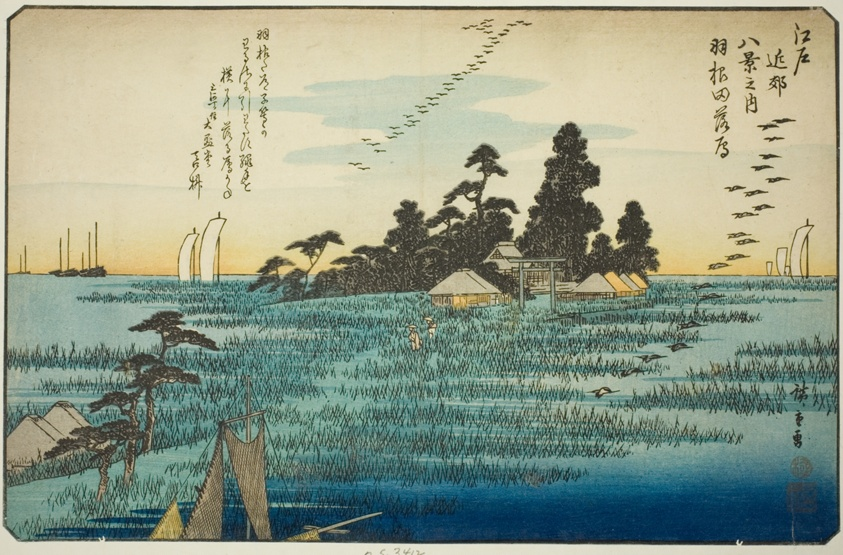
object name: Print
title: Descending Geese at Haneda (Haneda no rakugan), from the series "Eight Views in the Environs of Edo (Edo kinko hakkei no uchi)"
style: Japanese (culture or style)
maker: Utagawa Hiroshige 歌川 広重; Japanese, 1797-1858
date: c. 1837/38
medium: Color woodblock print; oban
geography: Japan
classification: woodblock print; print; asian art